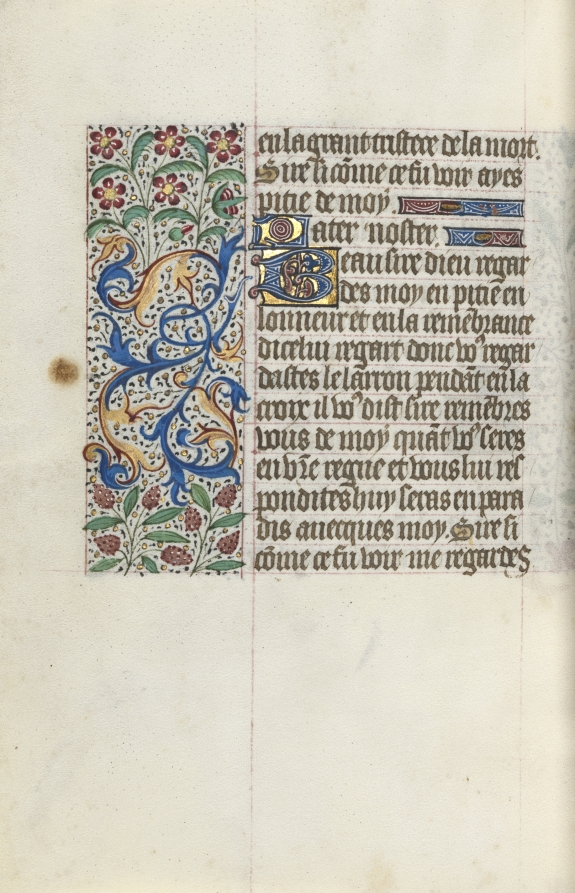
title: Book of Hours (Use of Rouen): fol. 154v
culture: France, Rouen, 15th century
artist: Master of the Geneva Latini (French, active Rouen, 1460–80)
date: c. 1470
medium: ink, tempera, and gold on vellum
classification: Bound Volume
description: In the late 1400s and early 1500s Rouen was an established and important center of book production. The city’s cathedral had a wealthy chapter that spent large sums of money to commission books and to maintain its extensive library. The stationers and booksellers would have likely been concentrated in or near the cathedral precinct. This artist, named after a manuscript now in Geneva, was Rouen’s principal illuminator during the second half of the 1400s.